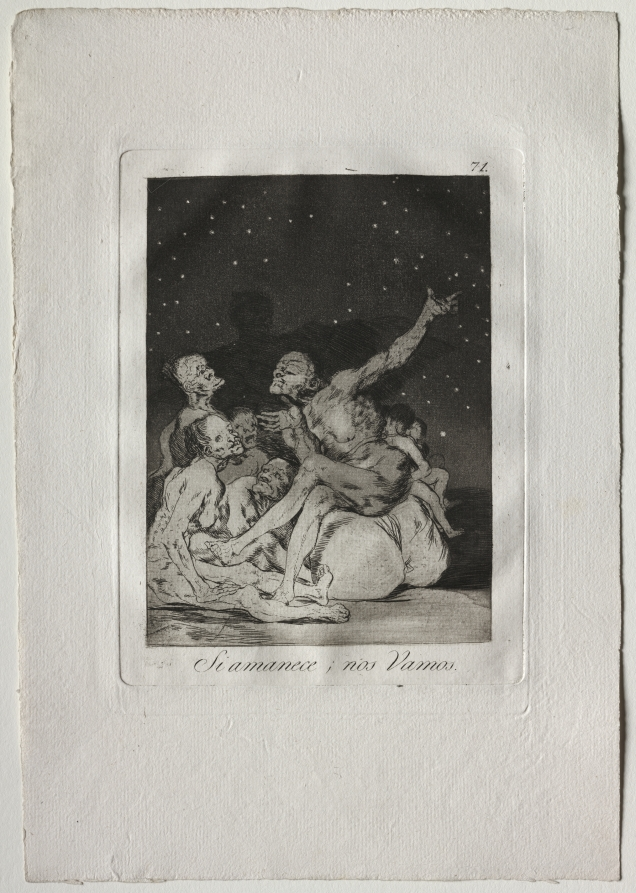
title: When Day Breaks We Will Be Off, Plate 71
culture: Spain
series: Los Caprichos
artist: Francisco de Goya (Spanish, 1746–1828)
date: 1799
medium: etching and aquatint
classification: Print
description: Francisco de Goya used printmaking to explore subjects that stirred controversy when represented in more public media, such as oil painting. This print belongs to Los Caprichos, a series of enigmatic images that critique the hypocrisy and irrationality the artist observed throughout contemporary Spanish society. Here, a group of witches prepares to fly without broomsticks or sight, suggesting ignorance and obliviousness. The dense and starry sky behind them was created using layers of aquatint—a technique that Goya was among the earliest and most expert artists to adopt.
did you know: Francisco de Goya gave each of the prints in Los Caprichos, including this one, intentionally cryptic titles.